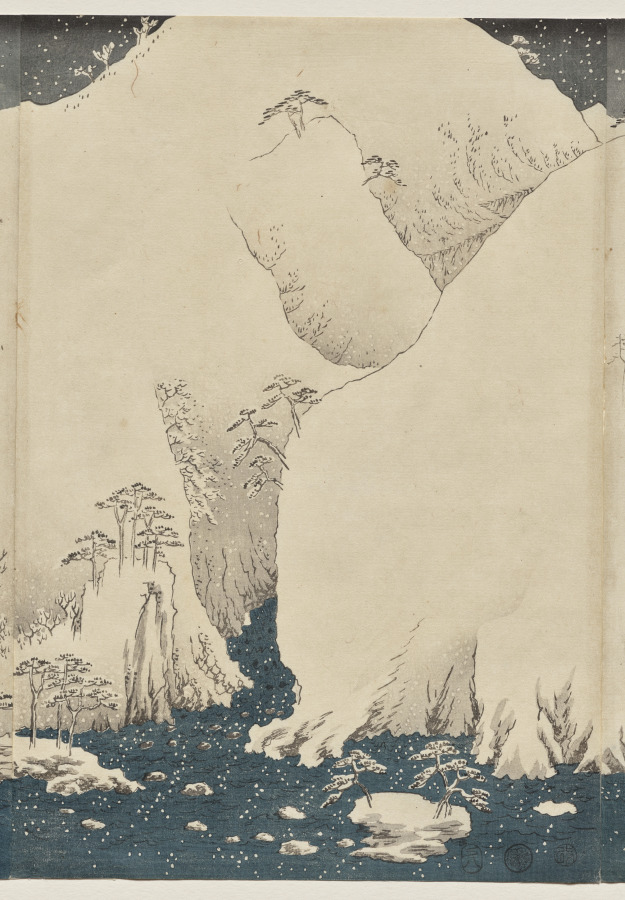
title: Mountain and River on the Kiso Road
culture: Japan, Edo period (1615–1868)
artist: Utagawa Hiroshige (Japanese, 1797–1858)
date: 1857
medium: One of a triptych of color woodblock prints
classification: Print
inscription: Signature: Hiroshige hitsu Publisher: Okazawaya Taheiji (emblem) Censorship Seal: aratame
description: Late in his career, Hiroshige explored the poetic theme of setsugekka, “snow, moon, and flowers,” in a set of three triptychs. This panoramic scene features a river passing snow-covered mountains along the Kiso Road.